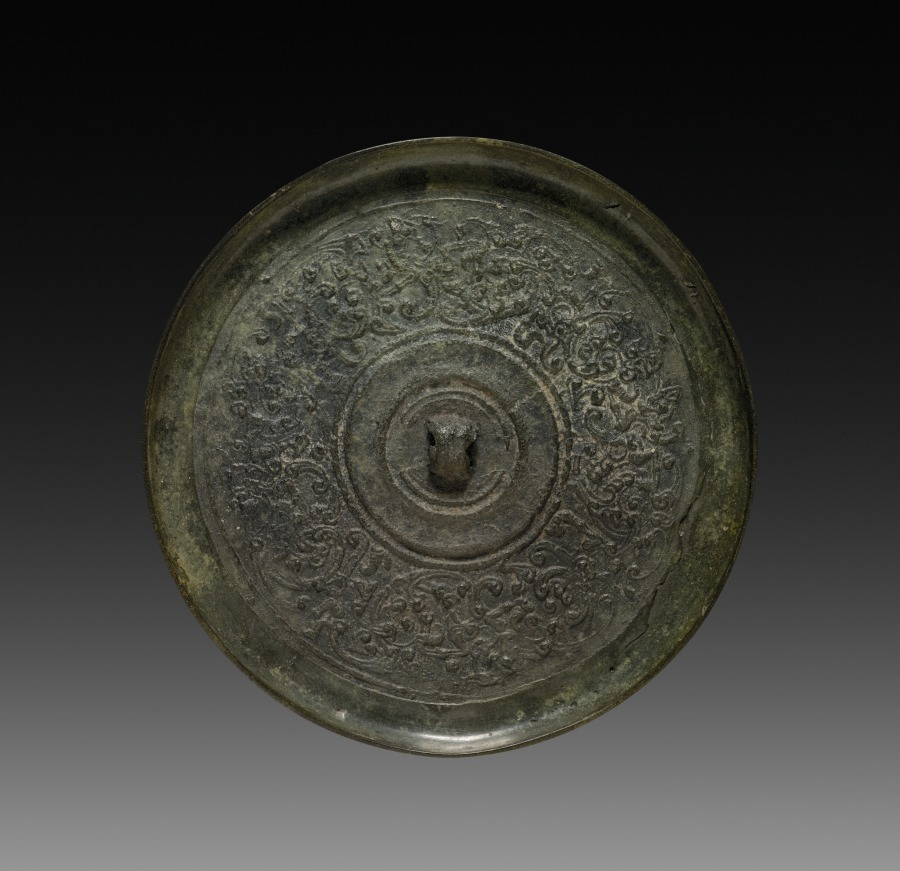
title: Mirror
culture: China, Han dynasty (202 BCE–220 CE)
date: 206 BCE–220 CE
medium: bronze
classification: Metalwork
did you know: There is high tin content in the bronze, which makes the mirror brittle.